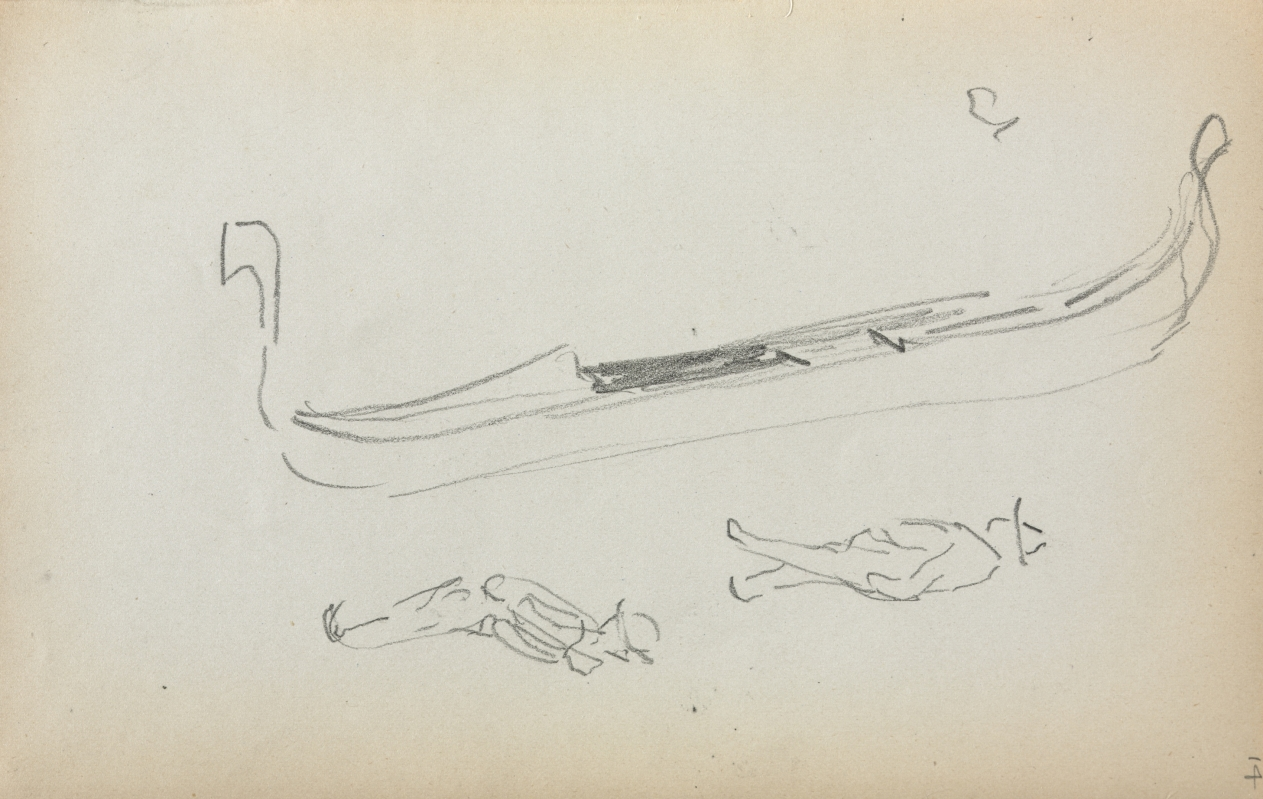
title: Italian Sketchbook: Gondola and Two Gondoliers (page 14)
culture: America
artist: Maurice Prendergast (American, born Newfoundland [now Canada], 1858–1924)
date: 1898–1899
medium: pencil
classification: Bound Volume